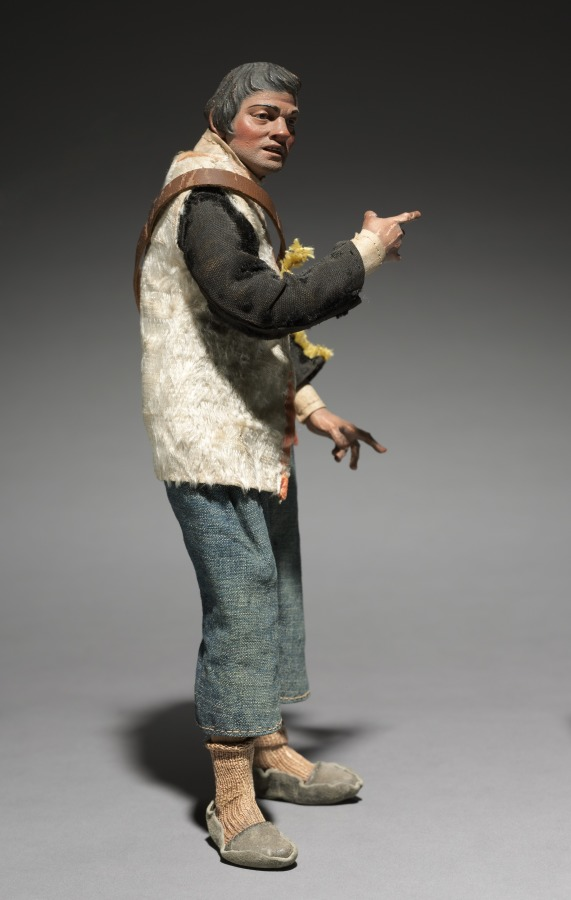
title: Figure from a Crèche: Standing Man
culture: Italy, Naples, late 18th-early 19th century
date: 1780–1830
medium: painted wood and terracotta with various textiles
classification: Sculpture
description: The practice of creating scenes of the Nativity for the home dates from the early 1700s in Italy, where people began to set up doll-like figures of about a foot or less in height. The custom was particularly popular in Naples around 1800, where crèche scenes (crèche means cradle, or crib) included many figures, whose heads and hands of painted terracotta, stuffed cloth bodies, and clothing adapted from contemporary local costumes gave them an amazingly realistic character. Representations of the birth of Jesus can be traced to the first few centuries of Christianity. Both living creatures and sculptural depictions of them were used from early times. By the late middle ages it was customary to create life-size figures of wood or stone, naturalistically painted, to represent the characters who participated in the events of Jesus's early life. These sculptures were then arranged in scenes illustrating one or both of the most important of these events, the Adoration of the Shepherds and the Adoration of the Magi-the three kings from the East who came to pay homage to the Christ child. Used in churches, these large figures were especially popular in Italy, Central Europe, Spain, and Portugal.